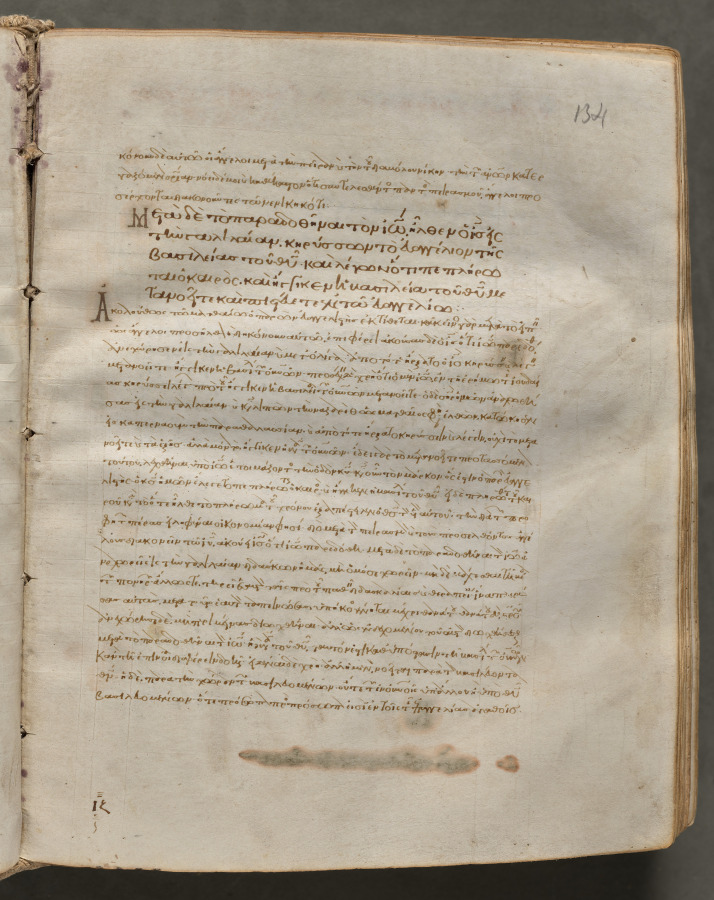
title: Text, folio 134 (recto), from a Gospel Book with Commentaries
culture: Byzantium, Constantinople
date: c. 1000–1100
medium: ink, tempera, and gold on vellum; leather binding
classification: Bound Volume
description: Each of the four gospels in this book opens on a page with brilliantly illuminated borders depicting the author of the text as well as birds-principally peacocks, symbols of the immortality of the soul-and fountains, representing the fountain of life and the salvation of the soul. This volume consists of 428 leaves with texts in Greek. Its level of sophistication suggests that it was probably written and decorated in a monastery in Constantinople.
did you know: Gospel Books were carried in procession through Byzantine churches.